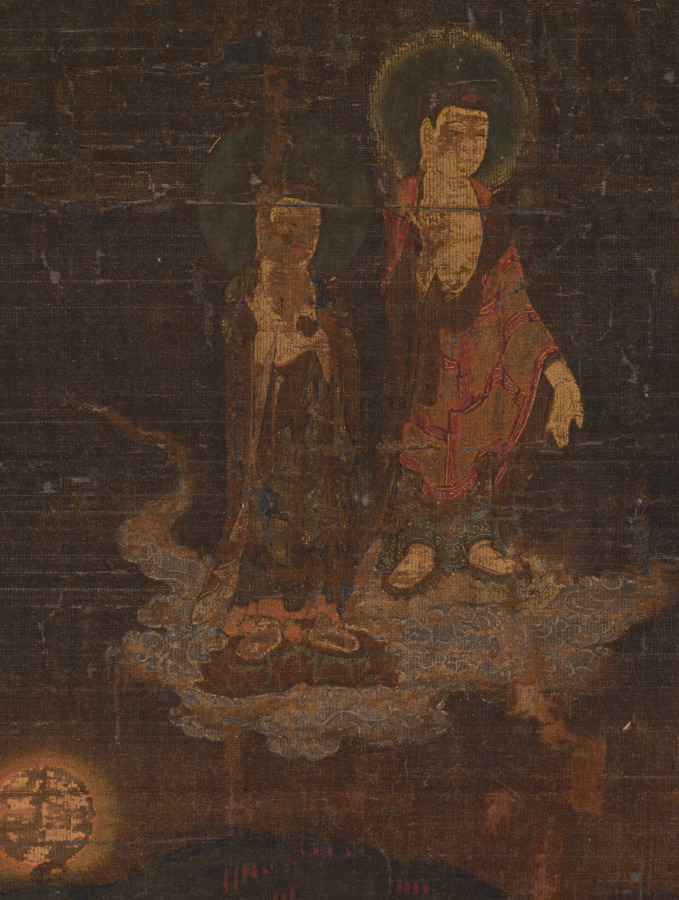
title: Kasuga Shrine Mandala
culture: Japan, Kamakura period (1185–1333)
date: early 1300s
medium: Hanging scroll; ink, color, and gold on silk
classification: Painting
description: A golden path beginning at the bottom of this painting leads up to four red-and-white buildings to the left, then to a fifth building on the right. These are the five shrine halls of Kasuga Taisha in Nara. Above and beyond the buildings is a sacred mountain range––with Mount Mikasa at center, Mount Wakakusa in gold to the left, and the sun or moon rising up behind the mountains. Sacred deer appear here and there. Five figures representing the original Buddhist forms of the five kami of the shrine complex stand on clouds above the mountains.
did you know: Sacred deer, the vehicles of the Kasuga deities, move about the shrine compound.